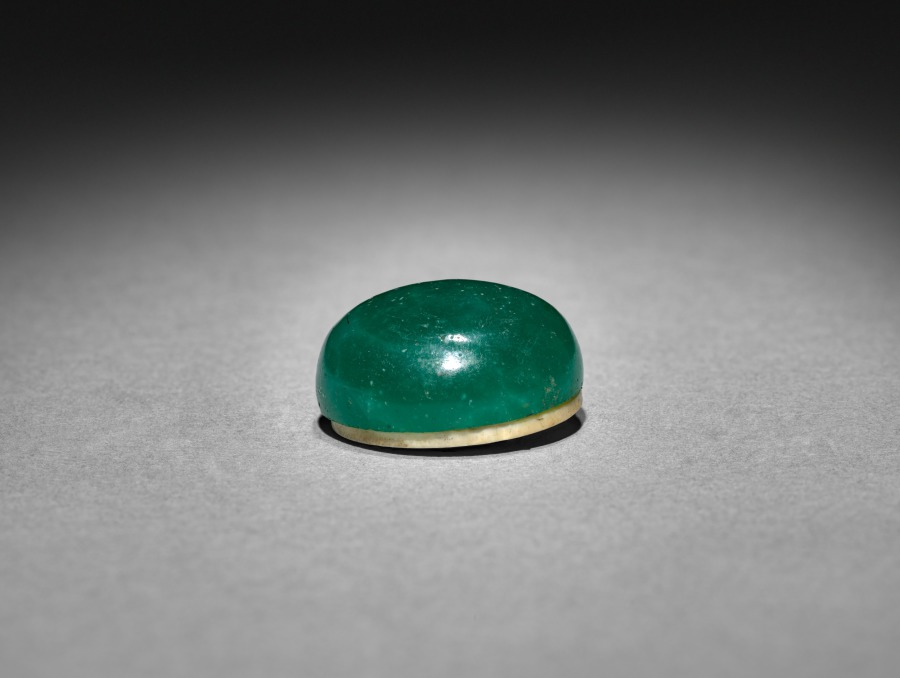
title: Snuff Bottle with Stopper (stopper)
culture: China, Qing dynasty (1644–1911), Qianlong reign (1736–95)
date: 1736–95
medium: glass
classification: Glass